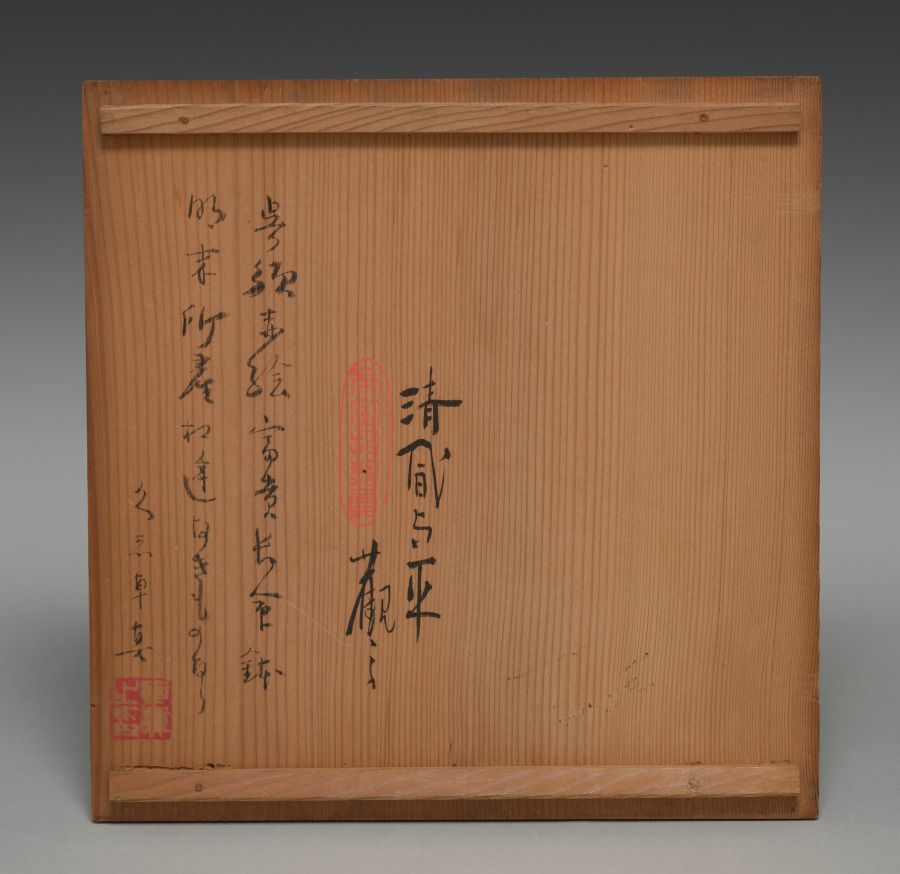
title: Bowl with Auspicious Ideographs and Floral Motifs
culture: China, Ming dynasty (1368–1644)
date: 1600s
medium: Stoneware with overglaze color enamels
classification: Ceramic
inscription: 長,命,富,貴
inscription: 【印】清風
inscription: 【印】大日本清風造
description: As part of their work, members of the Seifu studio, and Seifū Yohei III (三代清風与平, Japanese, 1851–1914), in particular, engaged in the viewing and appreciation of Chinese ceramics. While they were not authenticators, they would have been familiar with imported examples of Chinese stoneware and porcelain through tea gatherings, meetings with their elite clients, exhibitions, and other opportunities to see and study actual pieces from the mainland. This object and its box may be a reflection of Yohei III’s experiences of this kind. The bowl itself is slightly misshapen and roughly glazed with overglaze color enamels in red and green. Flanked by floral motifs, four Chinese characters brushed in red appear in roundels: 長命富貴. Meaning, respectively, longevity, life, prosperity, and status, they are pronounced together in Japanese as the phrase chōmeifūki, or “live long and prosper.” Additional loosely painted foliate designs in red and green circle the area above the foot and inside of the bowl. It is a relatively simple piece made by someone who was likely capable of much finer, more precise work but who could also do completely passable wares on short order. Of greater interest is the storage box lid for this piece. It has an inscription by Yohei III, with his seal, declaring it to be a “sweets dish from southern China with color images.” On the reverse of the lid, Yohei has written his name and placed his Imperial Household Artist seal, but instead of writing “made by,” he wrote “saw this [ceramic].” To the left of this is another inscription in a different hand, stating that the piece is a work from southern China with red-painted designs, produced at the very end of the Ming dynasty. It is signed “Kushi Takushin 久志卓真," along with his seal. Kushi Takushin (1898–1973) was a Japanese musician and music critic, as well as an antiques researcher and authenticator. He was especially interested in Ming dynasty Chinese ceramics and wrote extensively on Chinese, Japanese, and Korean ceramics. Originally from Hokkaido, he was active in Kyoto and began collecting art at a young age. Both he and Yohei appreciated and commented upon the bowl, and perhaps they both owned it.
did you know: Each roundel contains an auspicious word conveying good wishes for a long life and wealth.